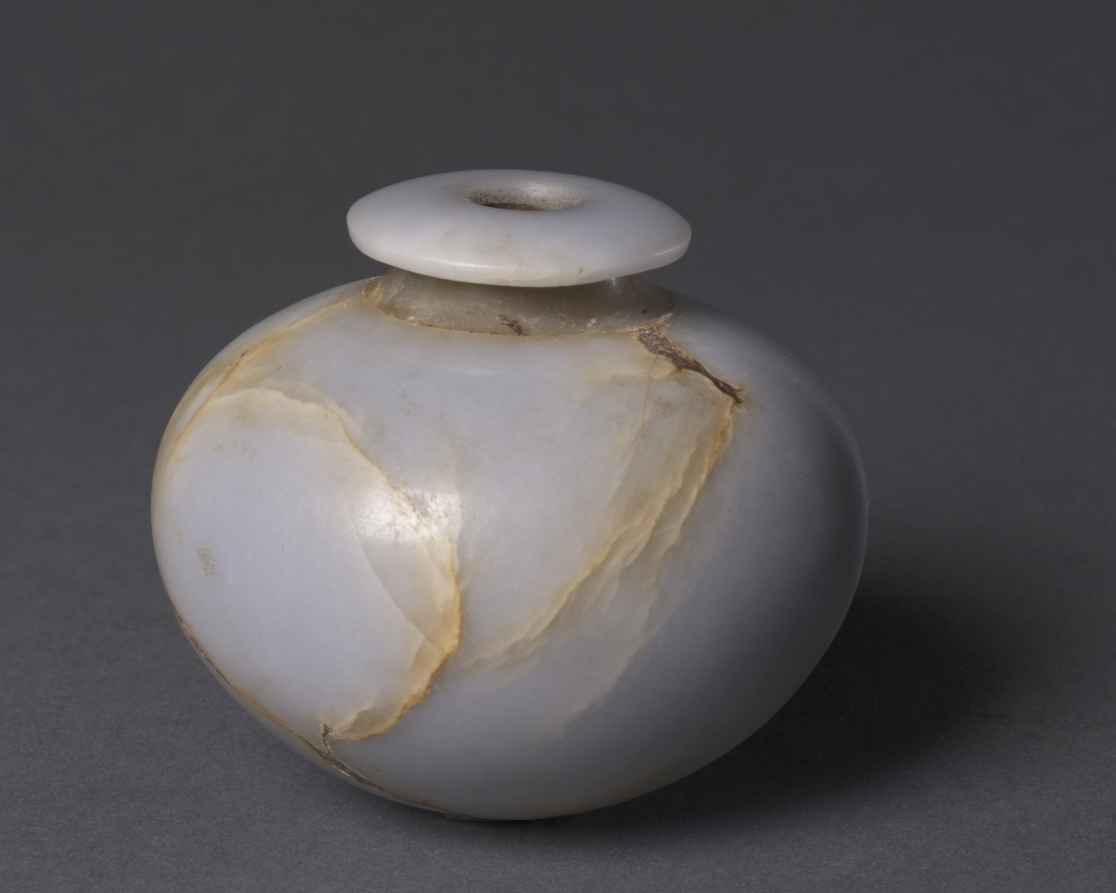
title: Cosmetic Vessel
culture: Egypt, Middle Kingdom (2040–1648 BCE), Dynasty 12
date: c. 1980–1901 BCE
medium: anhydrite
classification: Vessels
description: Cosmetic vessels would have once contained scented oils or ointments used for beautifying the body, while kohl containers held the eye paint seen in many depictions of ancient Egyptians. Galena, a mineral used in eye paint, helped reflect the sun and repelled insects and tiny organisms that could cause eye disease and blindness. Cosmetics were an essential element of daily life and associated with upholding the ancient Egyptians’ high standards of cleanliness.